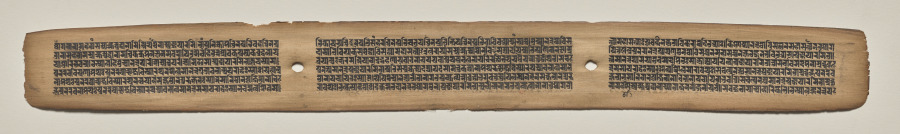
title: Text, folio 162 (recto), from a Manuscript of the Perfection of Wisdom in Eight Thousand Lines (Ashtasahasrika Prajnaparamita-sutra)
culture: Eastern India, Bihar, Vikramashila Monastery. Painting: Nepal, Kathmandu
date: Sunday, September 14, 1119 (year 239 of the Newar Samvat in the month of Ashvina)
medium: gum tempera and ink on palm leaves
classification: Painting